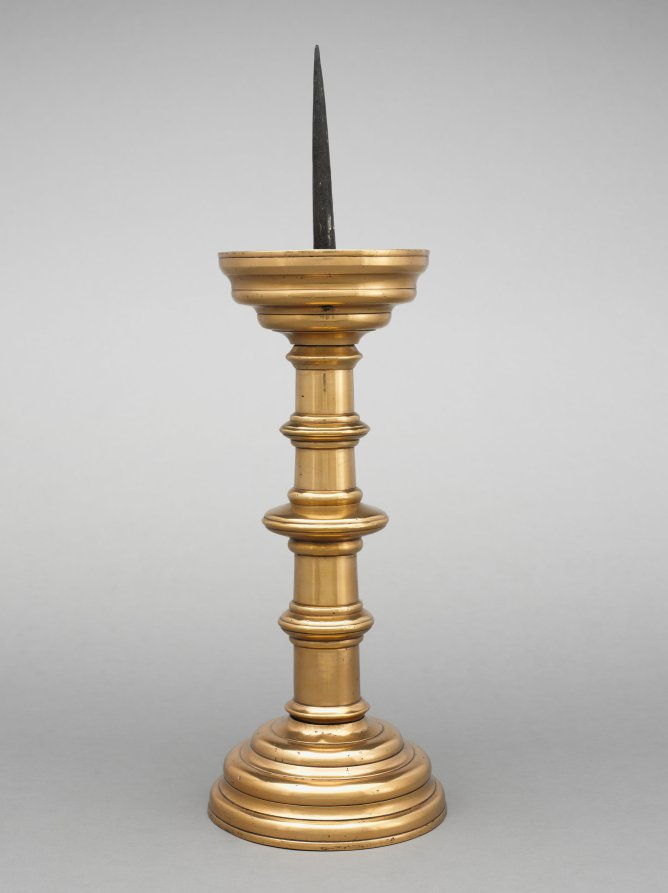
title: Pricket Candlestick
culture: South Netherlands, Valley of the Meuse, 16th century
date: early 1500s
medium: brass (hollow cast in three parts) and iron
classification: Metalwork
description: This object is an example of a type of metalwork known as "dinanderie," produced in and around the town of Dinant on the River Meuse in the Belgian province of Namur. Late medieval Dinant specialized in the production of these finely cast and finished objects in brass alloy, supplying aquamanilia, candlesticks, patens, basins, baptismal fonts, and other altar furniture throughout the Meuse Valley and for export beyond.